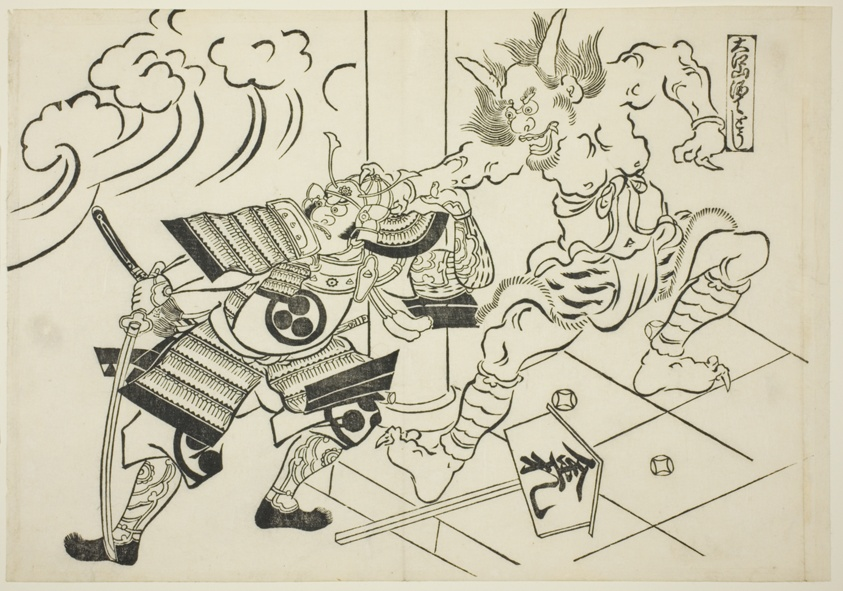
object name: Print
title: The Demon Shutendoji, from the album Yamato Irotake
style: Japanese (culture or style)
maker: Okumura Masanobu (Japanese, 1686-1764)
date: 1705-8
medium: Woodblock print; sumizuri-e, ōban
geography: Japan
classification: woodblock print; print; asian art; woodblock